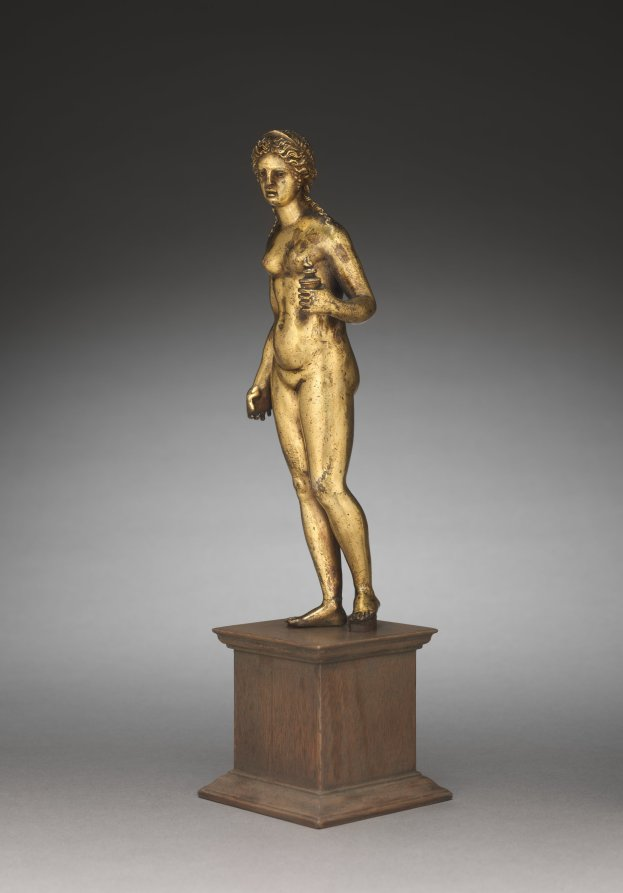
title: Venus with a Burning Urn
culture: Northern Italy, 16th century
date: c. 1500–1520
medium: gilt bronze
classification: Sculpture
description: Venus is the Roman goddess of many virtues, including Love, Charity, Fertility, and Victory. Here, Venus is represented as the goddess of Charity. She wears a crown, as Charity is often depicted as the Queen of the Virtues. The flaming lamp in Venus's left hand was also a symbol of Charity in Venice, where this piece is thought to have originated. The bent fingers of her right hand are bent suggest that Venus may have once held another object. Renaissance sculptors often looked back to antiquity when producing monumental and small bronze statues. The small bronze cabinet piece comes into Italian art during this time, bringing ancient gods and goddesses into Italian households. Venus stands in a contrapposto pose and, like Hellenistic and Roman objects, her locks are tied by a double ribbon while two curls fall on her shoulders. Her tilted head and large emotional eyes, as well as her small nose and parted lips reflect the influence of Hellenistic Greek facial styles.